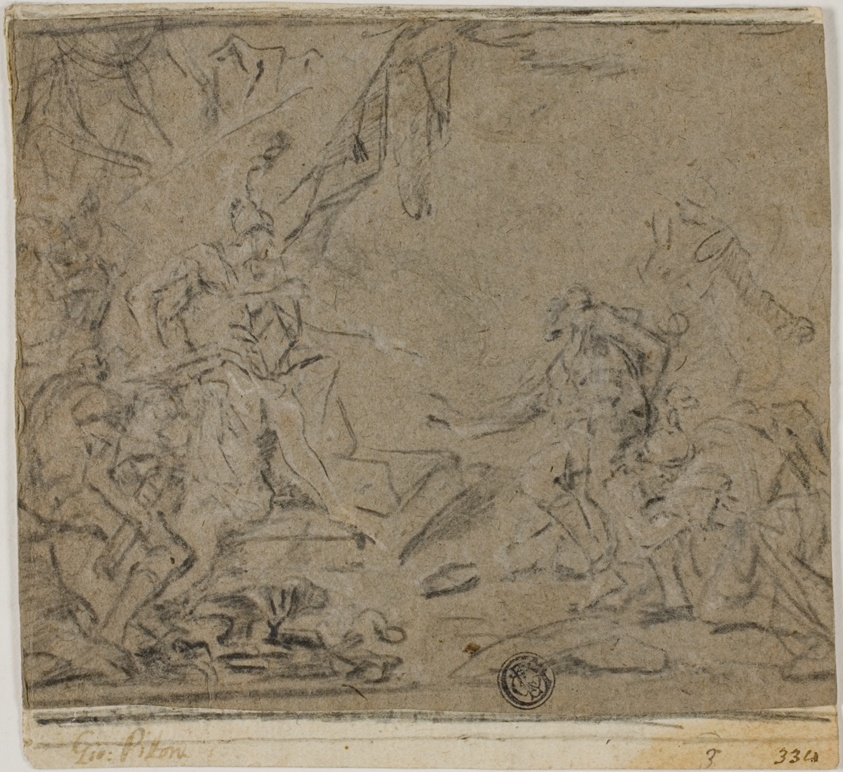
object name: Drawing and Watercolor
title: Family of Darius before Alexander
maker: Attributed to Giovanni Battista Pittoni, the younger (Italian, 1687-1767); or Alessandro Magnasco (Italian, 1667-1749); or Gaspare Diziani (Italian, 1689-1767); or style of Alessandro Magnasco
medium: Black chalk heightened with white chalk, on brown laid paper, tipped onto ivory laid paper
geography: Italy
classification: chalk; drawings (visual works); prints and drawing